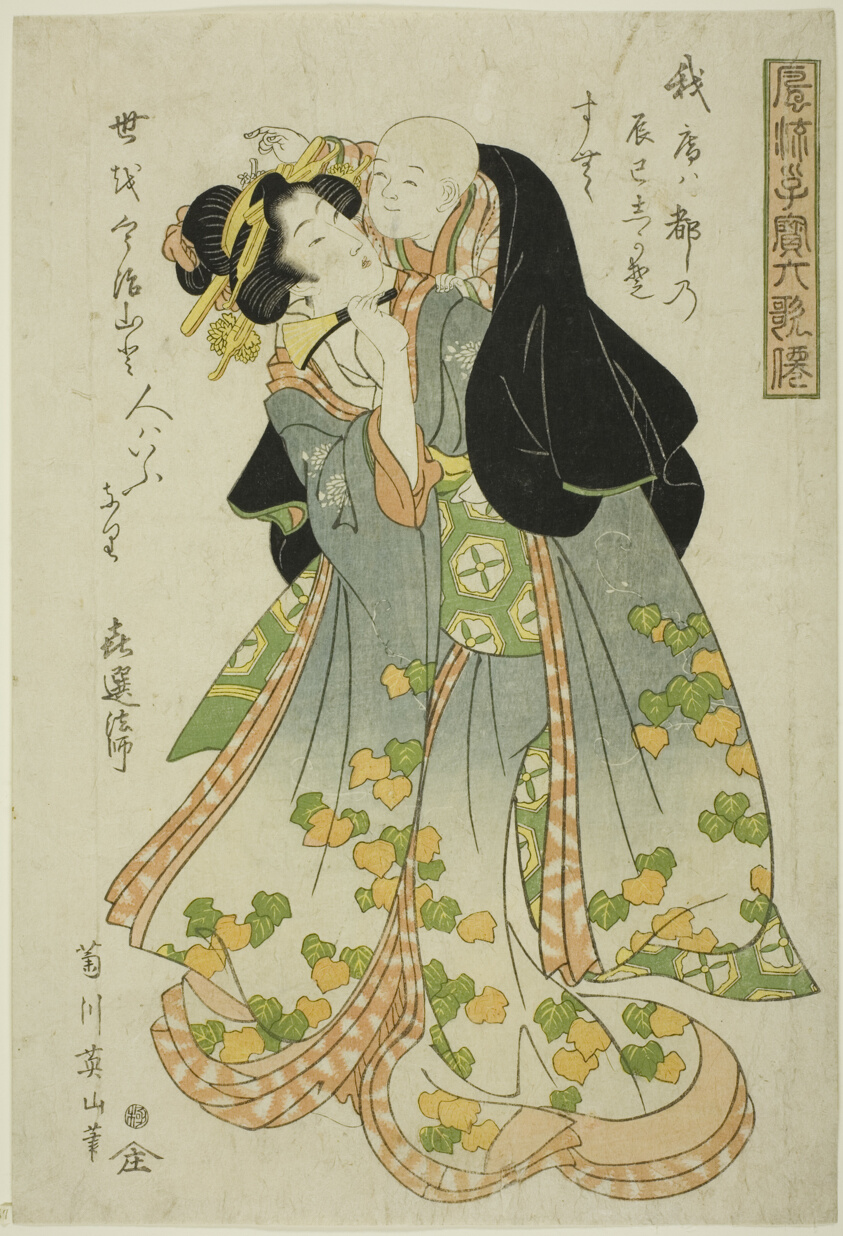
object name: Print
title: Kisen Hoshi, from the series "Fashionable Children as the Six Immortal Poets (Furyu kodakara rokkasen)"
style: Japanese (culture or style)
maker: Kikukawa Eizan (Japanese, 1787-1867)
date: c. 1814/17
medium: Color woodblock print; oban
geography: Japan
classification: woodblock print; print; asian art